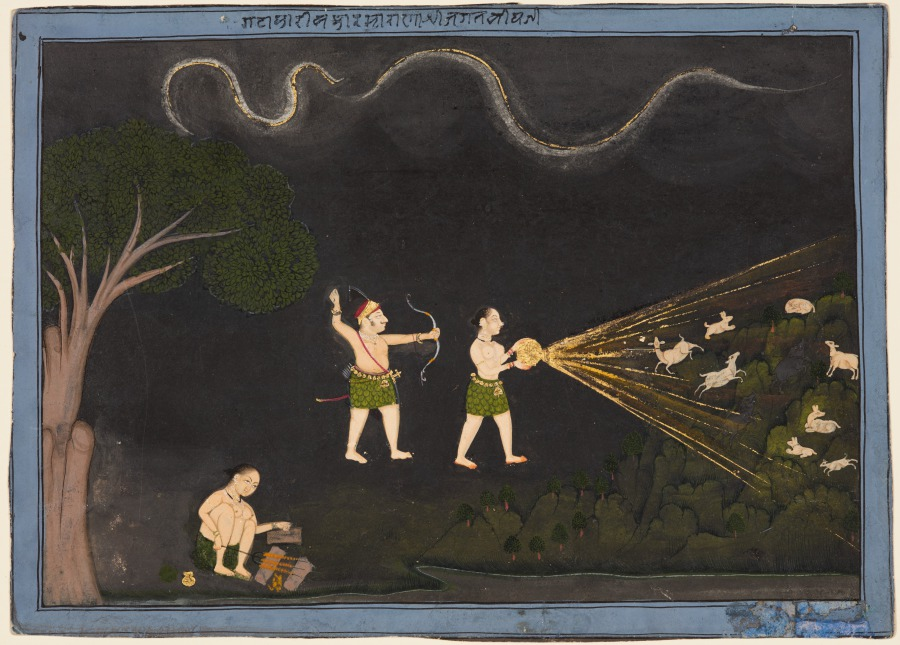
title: Maharana Jagat Singh II of Mewar (r. 1734–51) Dressed as a Bhil, Hunting Deer at Night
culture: Northwestern India, Rajasthan, Rajput Kingdom of Mewar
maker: attributed to Chokha (Indian, active c. 1799–1824)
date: c. 1735–40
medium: gum tempera, ink, and gold on paper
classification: Painting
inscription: gatālā (?) rī sakāra mhārānā śrī jagata siṃgha jī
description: The ruler, who has the title Maharana, wears the leaf skirt of the Bhil people of Western India, as he hunts deer with a female tracker. They both wear a girdle of bells to scare the quarry out of the underbrush, and she illuminates them using directed light from a lamp in a pot. The king has shot a deer in the neck; rabbit, antelopes, and boar scamper away.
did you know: A woman also wearing a leaf skirt roasts kabobs on a three-pronged fork for a midnight snack on the riverbank.